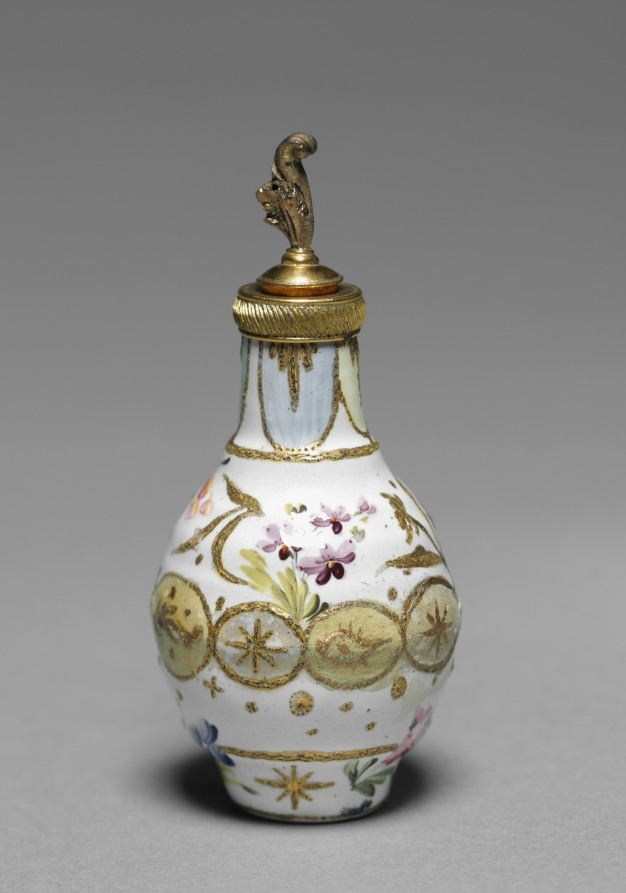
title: Scent Bottle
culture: England, Staffordshire, late 18th Century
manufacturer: Staffordshire Factory (British)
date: late 1700s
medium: enamel on copper with gilt metal mounts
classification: Miscellaneous